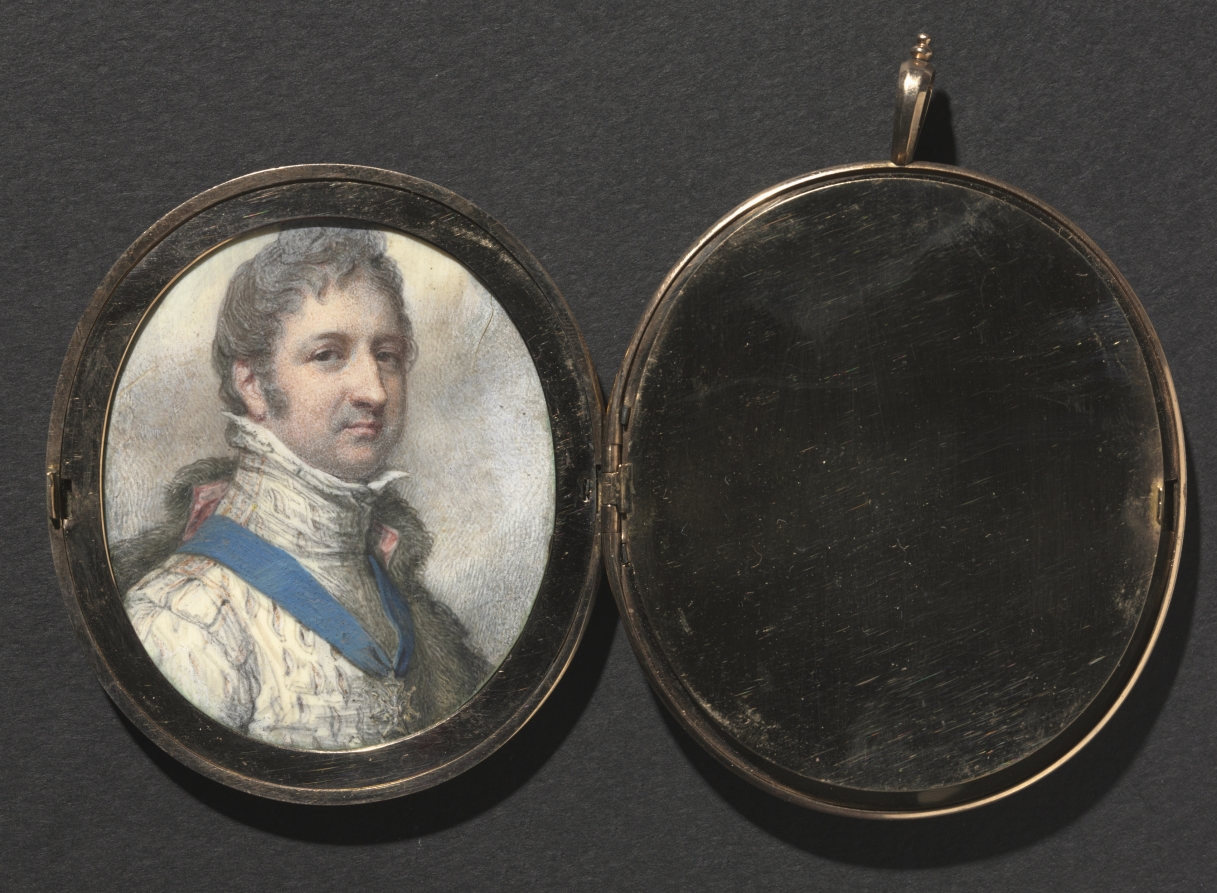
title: Portrait of Louis-Philippe, Duke of Orléans, later King of the French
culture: England, early 19th Century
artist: Richard Cosway (British, 1742–1821)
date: 1804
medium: watercolor on ivory in a gold locket frame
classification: Portrait Miniature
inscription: signed on backing: Rdus Cosway / R.A. et F.S.A. / Primarius Pictor / Serenissimi Walliae / Principie / Pinxit / 1804.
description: Louis-Philippe (1773–1850, king of the French 1830–48) was the son of Louis-Philippe Joseph, duc d’Orléans, who was known as Philippe-Egalité during the French Revolution. The Orléans family was a branch of the House of Bourbon. This work was painted while Louis-Philippe was in exile and living in England from 1800 until 1815, when Napoleon abdicated. He finally succeeded Charles X as king of France in 1830. During the February Revolution of 1848, Louis-Philippe was again forced into exile in England where he died two years later. Richard Cosway had painted Louis-Philippe (as well as his siblings and father) when the family was in England immediately following the outbreak of revolution in 1789. Louis-Philippe would have been thirty-one years old when this work was executed. He wears the Order of the Holy Spirit, a chivalric order of the French monarchy, which can be distinguished by its white dove surrounded by green flames at the center of a Maltese cross, with fleur-de-lis between the arms of the cross. Instead of the brilliant turquoise and white cloud background traditionally associated with Cosway, this miniature has the more restrained, gray, hatched background that characterizes the artist’s later works. The surface of the work is much marred by an irreversible crystallization of the paint layer that further emphasizes the gray tones throughout. The form of the unmarked case is typically English, but the motif is French, which may indicate a French goldsmith imitating the English style. The motif resembles a swan composed of foliate scrolls. A lock of plaited brown hair is also enclosed under glass within the locket, facing the miniature.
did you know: Without DNA analysis it is impossible to know to whom the hair belonged, though the most likely candidate is Louis-Philippe himself.